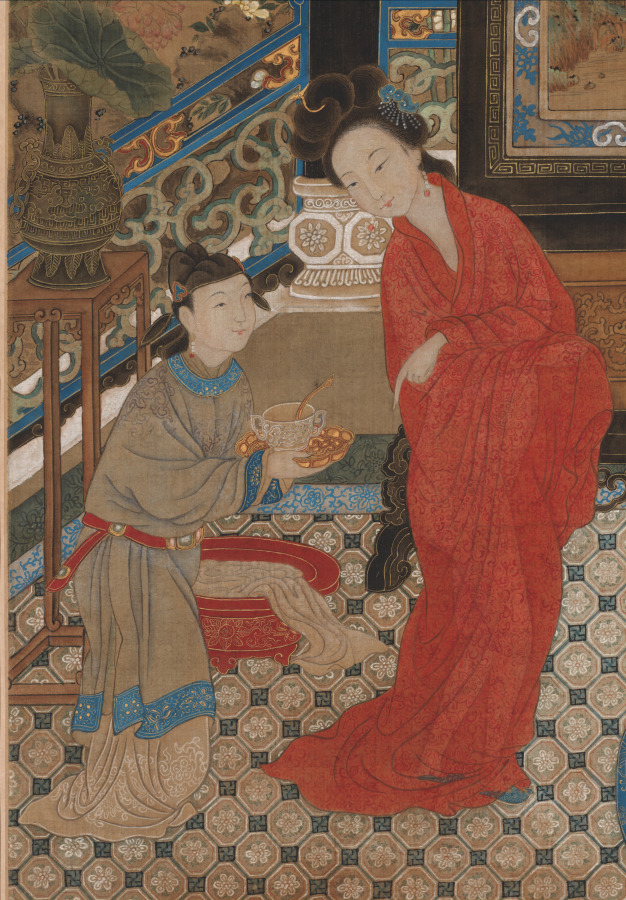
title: Yang Guifei Leaving the Bath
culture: China, Qing dynasty (1644-1911)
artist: Gu Jianlong (Chinese, 1606–after 1689)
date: 1700s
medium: Hanging scroll; ink, colors and gold on silk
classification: Painting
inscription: 丙辰冬至後二日 雲臣顧見龍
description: This painting relates to the legendary love story between Tang dynasty (618–906) emperor Xuanzong and his consort, the beautiful Yang Guifei. Set in what appears to be an 18th-century southern interior, the artist depicts Yang Guifei in a fashionable dress of semitransparent red gauze. Due to the warm and humid climate in China’s southeast, local silk workshops specialized and excelled in making airy gauze garments. Yang’s nude body can be seen through the red robe as she leaves the bath. Her servant offers her a bowl of soup. The presence of a male figure would have been a breach of customary protocol; cross-dressed as a male scholar, the earrings reveal that Yang’s attendant is in fact a girl.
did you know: Due to the warm and humid climate in China’s southeast, silk workshops specialized in making airy gauze garments, like the one worn by Yang Guifei here.